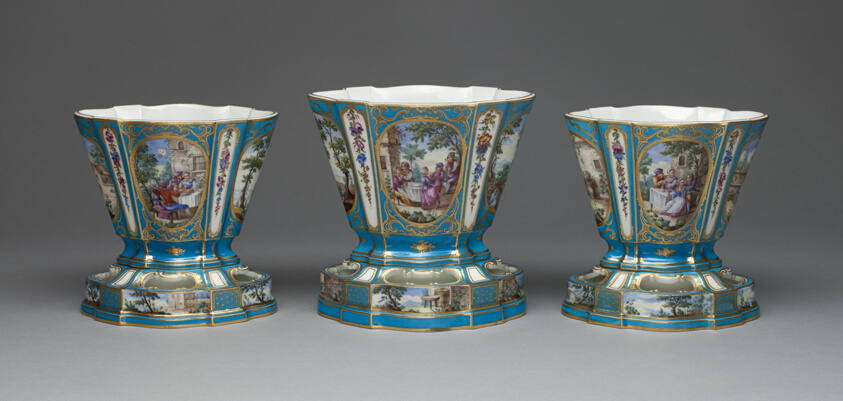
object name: Ceramics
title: Garniture of Three Flower Vases (Vases Hollandois)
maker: Sèvres Porcelain Manufactory; French, founded 1740; Painted by André-Vincent Vielliard; (French, 1717-90, active 1752-90)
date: c. 1761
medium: Soft-paste porcelain, polychrome enamels, and gilding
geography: Sèvres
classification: vase; vessel; porcelain; ceramics; european decorative arts